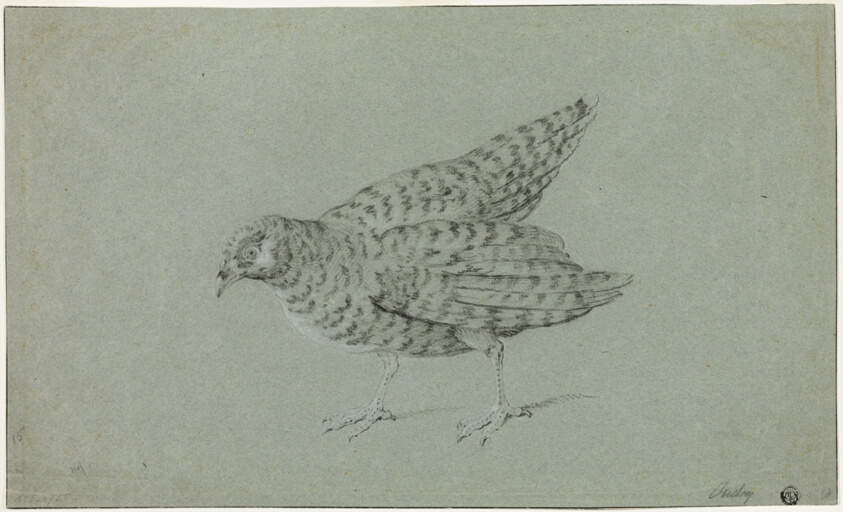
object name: Drawing and Watercolor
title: Partridge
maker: Jean-Baptiste Oudry (French, 1686-1755)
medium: Black chalk, heightened with white chalk, on blue laid paper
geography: France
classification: chalk; drawings (visual works); prints and drawing